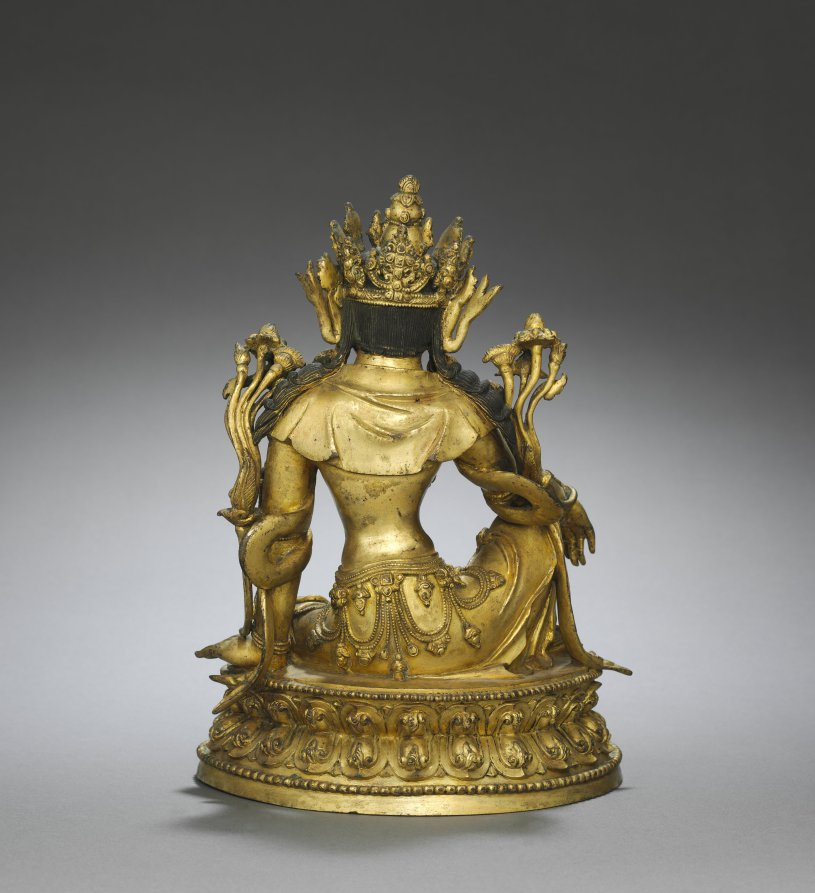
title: Seated Guanyin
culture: China, Ming dynasty (1368–1644)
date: c. 1450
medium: gilt bronze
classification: Sculpture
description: A heavily jeweled Guanyin sits in the posture of royal ease on a double-lotus throne. Also known as Avalokitesvara or the Bodhisattava of Compassion, Guanyin postponed achieving enlightenment in order to assist all who cry out for help. This made Guanyin a very popular devotional figure for Buddhists. This gilt bronze's size suggests that it could have been placed on a private altar or shrine for personal devotion.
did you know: There are clusters of blossoming lotuses by the figure's shoulders.